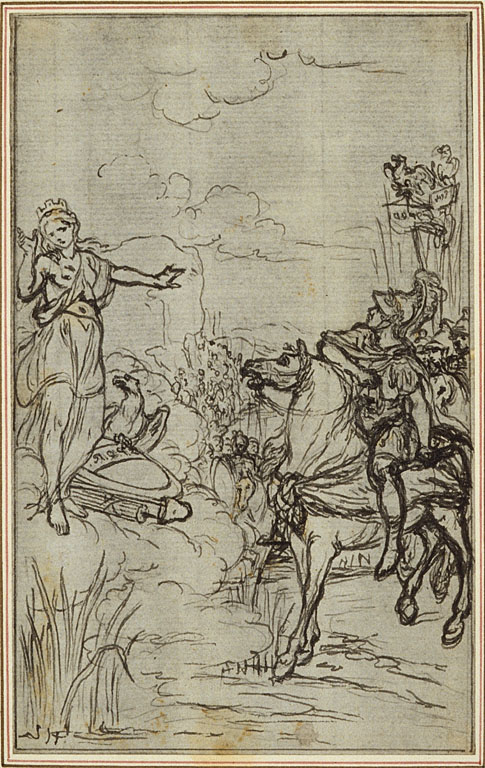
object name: Drawing and Watercolor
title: Study for Lucain's "La Pharsale", Canto I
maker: Hubert François Gravelot (French, 1699-1773)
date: c. 1766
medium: Pen and black ink, over touches of graphite, on gray laid paper, incised for transfer and perimeter mounted on ivory laid paper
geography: France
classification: pen and ink drawings; drawings (visual works); prints and drawing